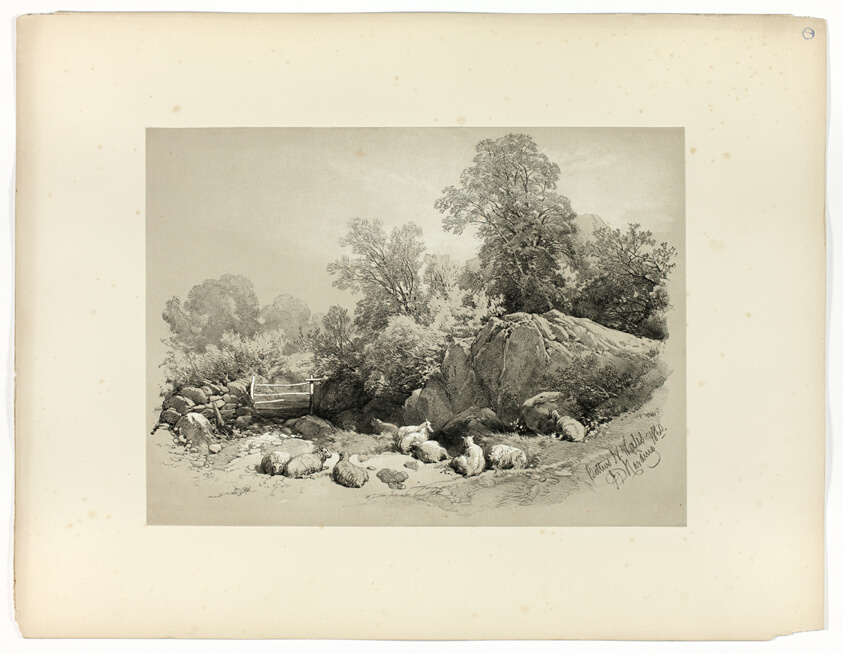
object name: Print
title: Bettws, N. Wales, from Picturesque Selections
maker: James Duffield Harding, (English, 1798-1863); Published by W. Kent and Co.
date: 1860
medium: Lithograph on paper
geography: England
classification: lithograph; print; prints and drawing